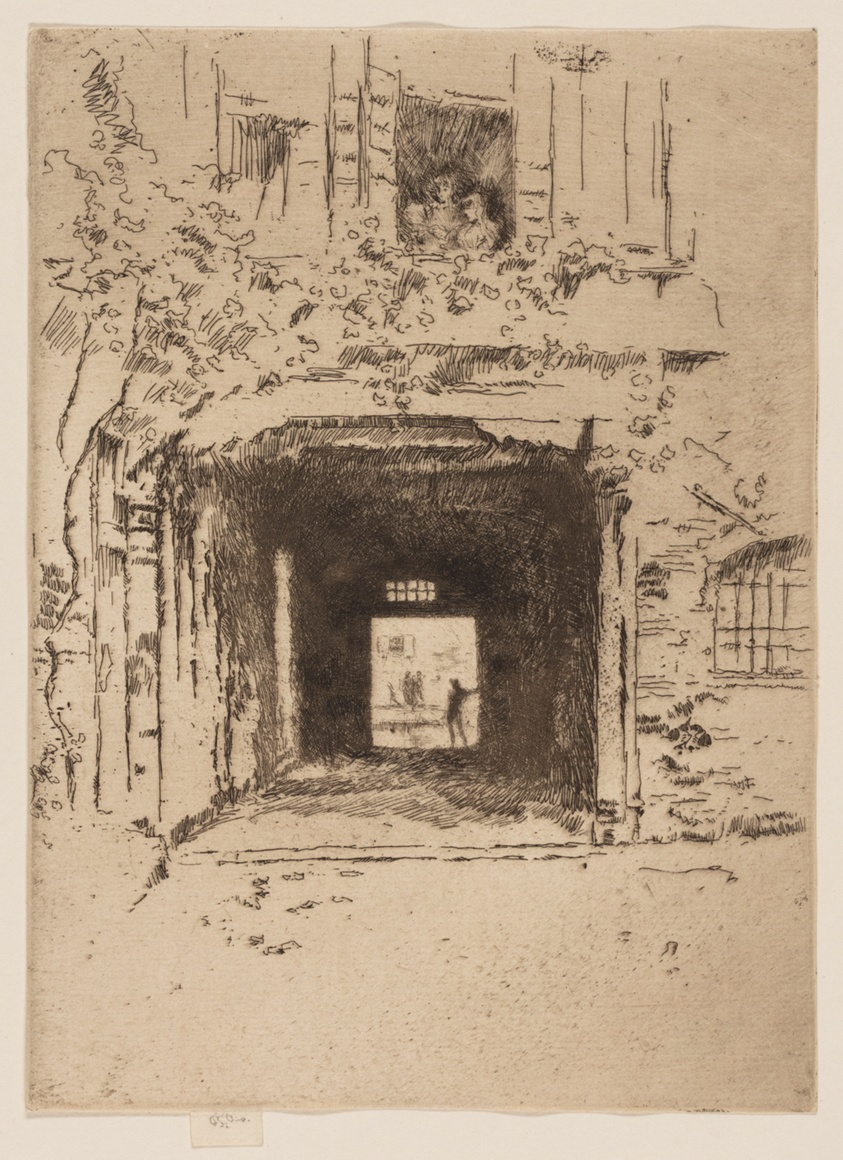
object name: Print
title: Doorway and Vine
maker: James McNeill Whistler (American, 1834-1903)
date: 1879/80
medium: Etching and drypoint with foul biting in black ink on ivory laid paper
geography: United States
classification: etching; foul biting; print; prints and drawing; paper; drypoint